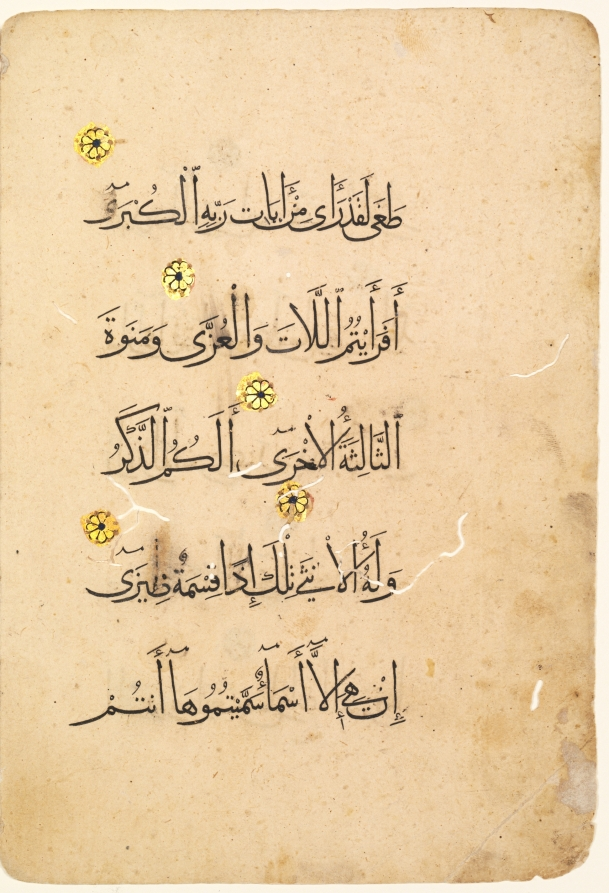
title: Qur'an Manuscript Folio (verso) (right side of bifolio)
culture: Egypt, Mamluk sultanate (1250–1517)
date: 1300s–1400s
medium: ink, gold, and colors on paper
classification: Drawing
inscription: Sura al-Najm [Chapter:The Stars] 53: part 17-part 23 (Arabic) Muhaqqaq (five lines to a page)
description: It is through the Arabic language that the Qur’an was revealed to the Prophet Muhammad in the 600s. As a result, calligraphy is celebrated as the highest form in Islamic art. The verses (ayat) written here come from the 53rd chapter (surah) of the Qur’an, also known as the Surah An-Najm, the Chapter of the Star. The significance of the Qur’an provides an explanation for the importance of calligraphy, but its use was not restricted to religious texts. Many objects in the museum's Islamic collection bear calligraphic inscriptions and come from secular contexts, displaying the versatility and creativity of this art form.